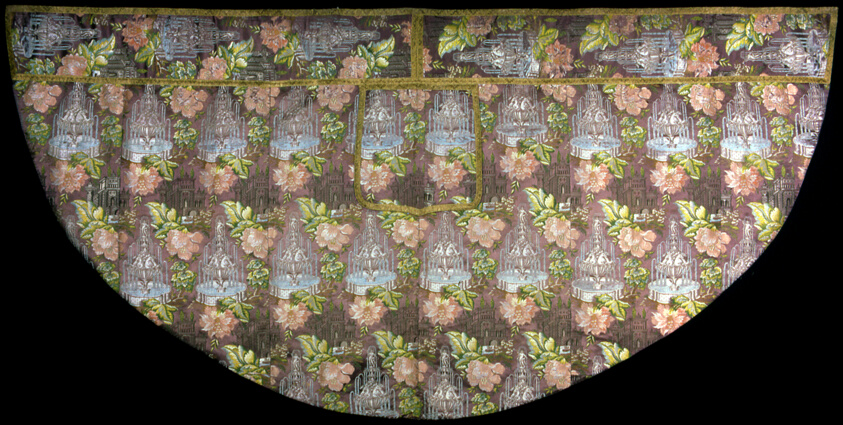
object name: Textile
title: Cope with Hood and Orphrey Band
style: louis xv, european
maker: France or Italy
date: 1725/75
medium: Silk, satin weave with twill interlacings of secondary binding warps and brocading and self-patterning complementary ground wefts; edged with silk and gilt-metal-strip-wrapped silk woven tape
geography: France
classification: textile; weaving; liturgical